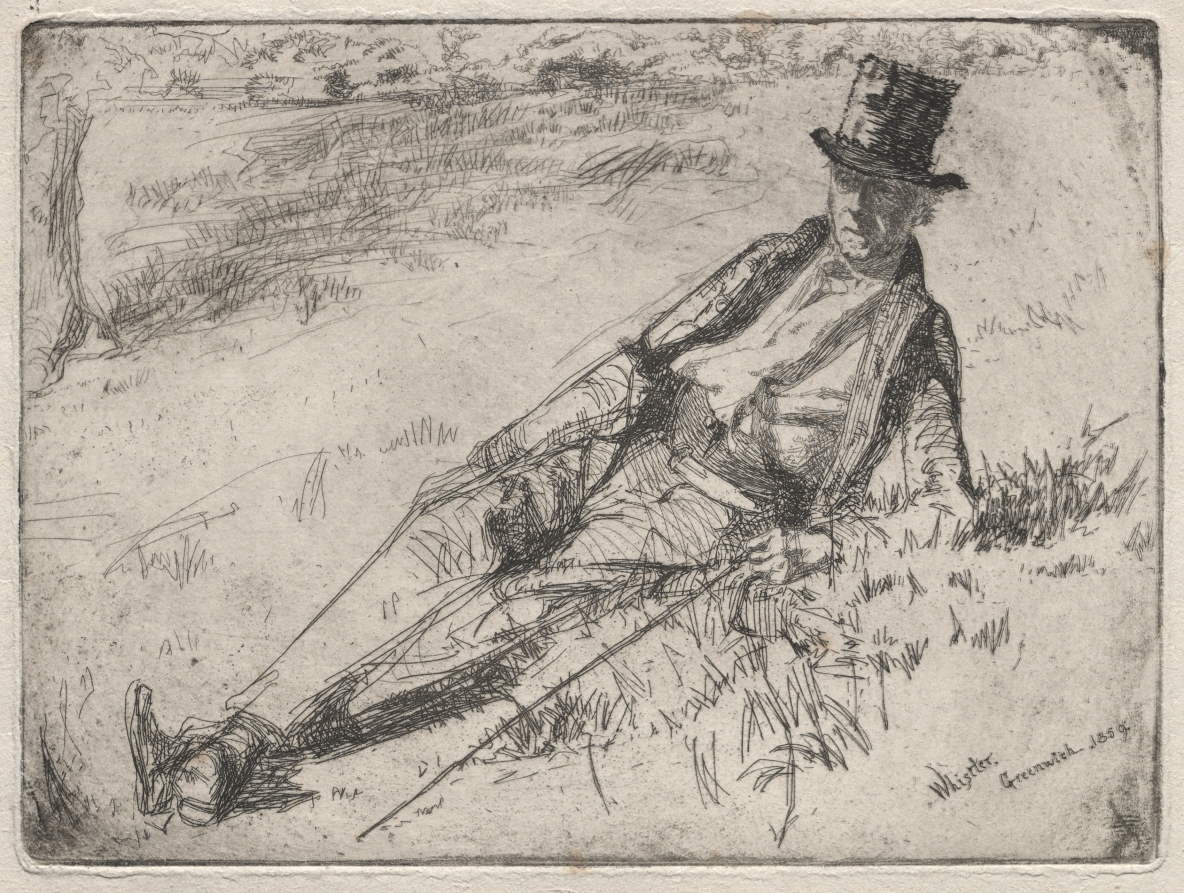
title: Greenwich Pensioner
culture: America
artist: James McNeill Whistler (American, 1834–1903)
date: 1859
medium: etching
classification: Print